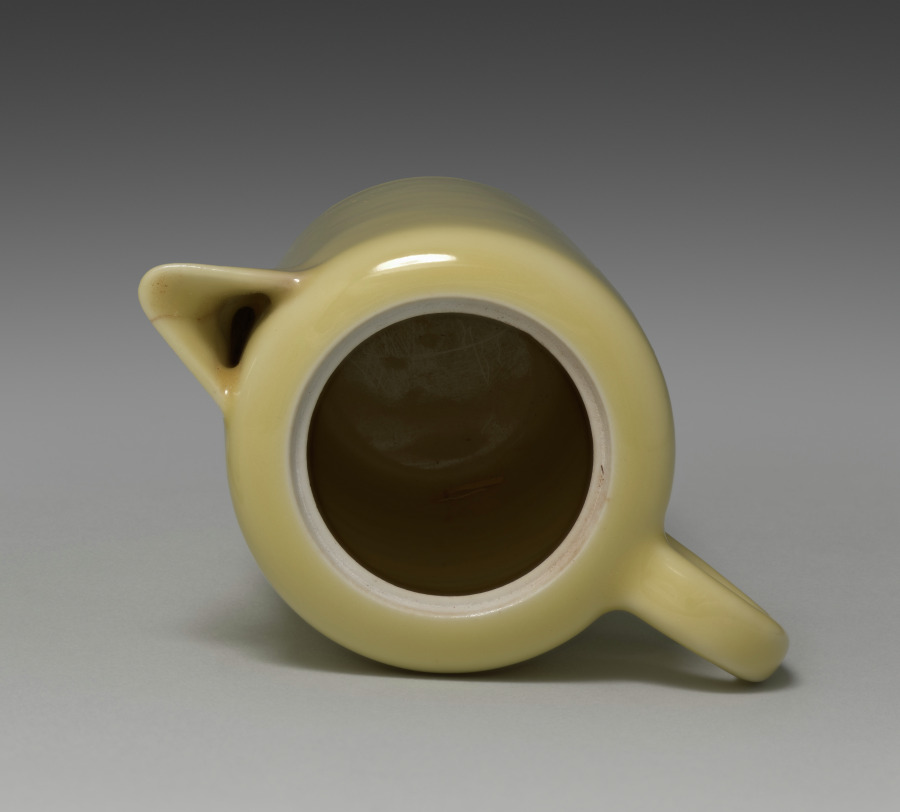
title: Sake Pourer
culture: Japan, Taishō period (1912–26) or Shōwa period (1926–89)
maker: Seifū Yohei IV (Japanese, 1872–1951)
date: 1914–46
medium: Porcelain with yellow glaze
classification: Ceramic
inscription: 清風造 。 【印】 清風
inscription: 成山清風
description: Like his father, Yohei IV also produced works with red or yellow monochrome glazes. His yellow-glazed works include this pair of sake pourers, a set of five drinking cups CMA 2022.217, and a sweets bowl molded into the shape of a chrysanthemum CMA 2022.218.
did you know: The lid's handle is made of bamboo.